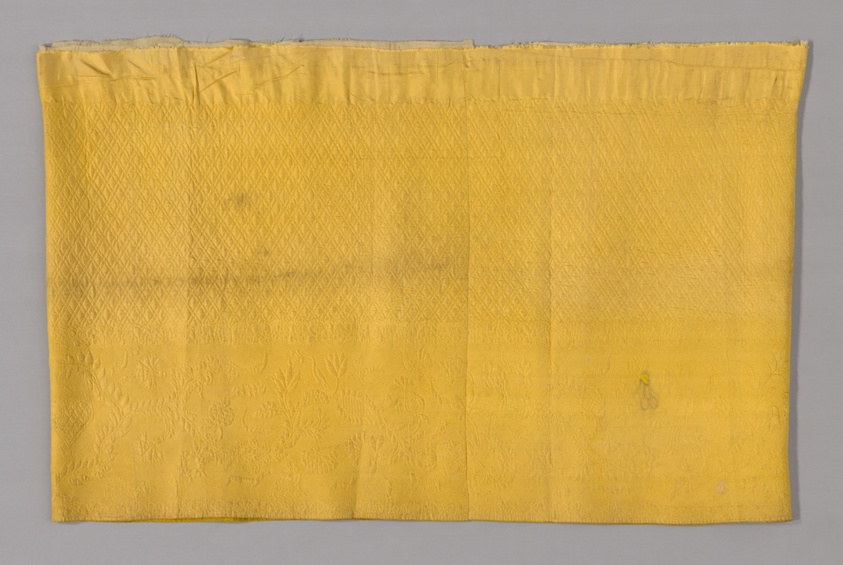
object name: Textile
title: Petticoat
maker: United States, probably Rhode Island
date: 1775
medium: Silk, plain weave; backed with wool, plain weave; quilted with silk thread; batting of wool; top edge facing of wool, twill weave; skirt and side binding of silk, satin damask weave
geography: Rhode Island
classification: textile; needlework (visual works); costume